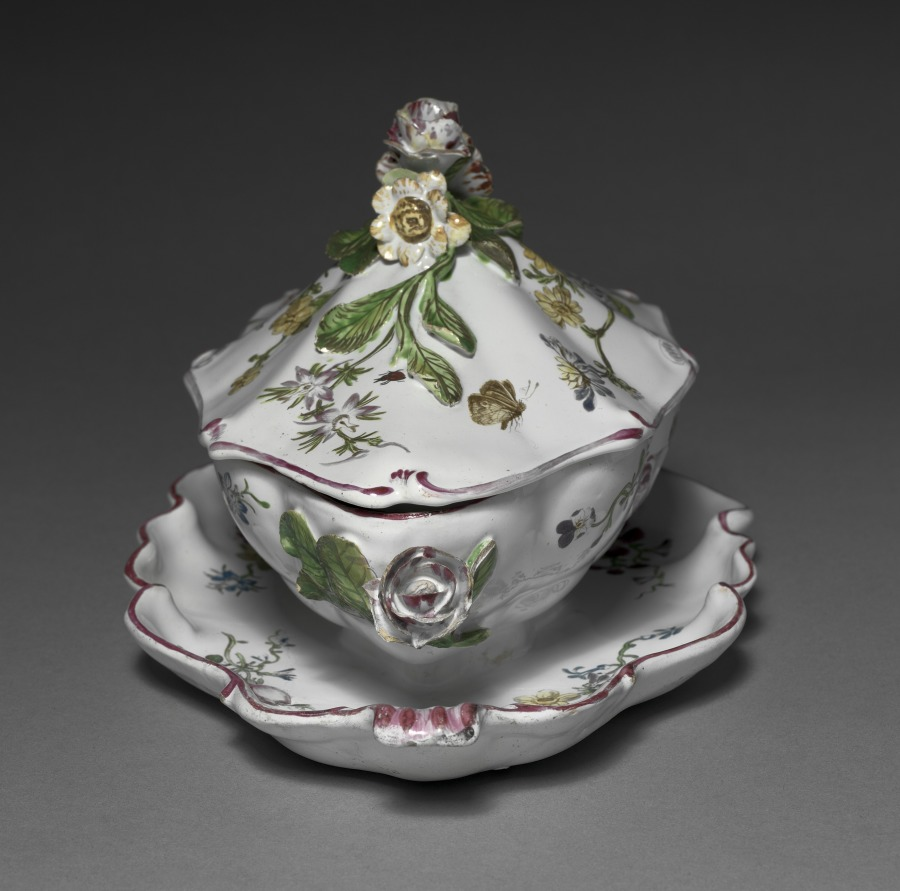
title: Covered Sauce Tureen with Attached Stand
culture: France, Marseilles, 18th century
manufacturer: Veuve Perrin Factory (French)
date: c. 1765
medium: tin-glazed earthenware (faience) with enamel decoration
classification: Ceramic